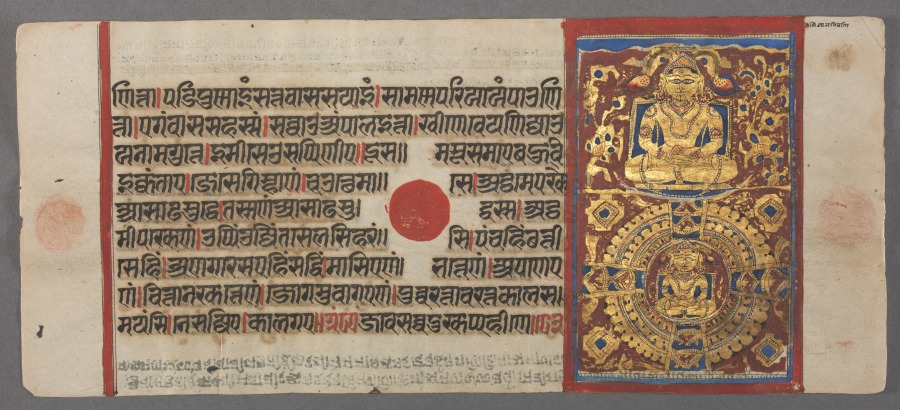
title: Kalpa-sutra manuscript with 24 illuminations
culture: Western India, Gujarat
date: c. 1475–1500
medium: Gum tempera, ink, and gold on paper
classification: Painting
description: Though paper manuscripts would have been wrapped in cloth rather than bound with string, conservative manuscript producers located the place for the string's hole with a red dot. Dating back to at least the early centuries of the first millennium, the text is written in Sanskrit in an Indian script known as devanagari. The smaller text written in the margins is a commentary that discusses the meaning of the main text.